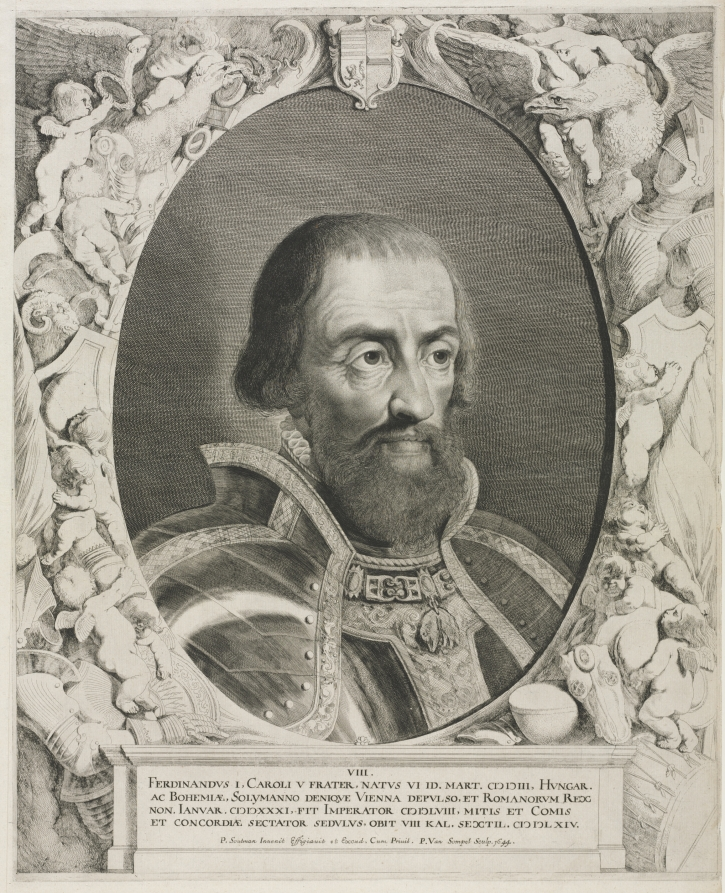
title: Portrait of Emperor Ferdinand I, from the series Imperatores Domus Austriacæ ...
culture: Flanders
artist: Pieter van Sompel (Flemish, c. 1600–after 1644)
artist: after Pieter Claesz. Soutman (Dutch, 1657)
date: 1644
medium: engraving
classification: Print